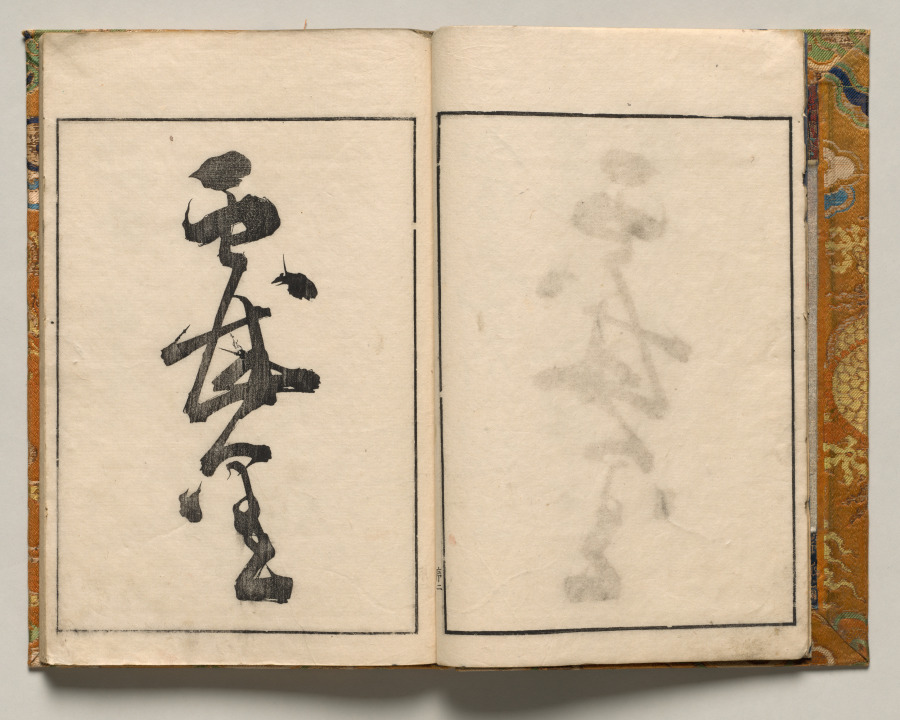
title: Calligraphic Motto from Shazanrō Picture Book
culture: Japan, Edo period (1615–1868)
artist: Tani Bunchō (Japanese, 1763–1841)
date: 1816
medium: Woodblock-printed book; ink and color on paper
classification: Bound Volume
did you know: Shazanrō was one of Tani Bunchō's style names.